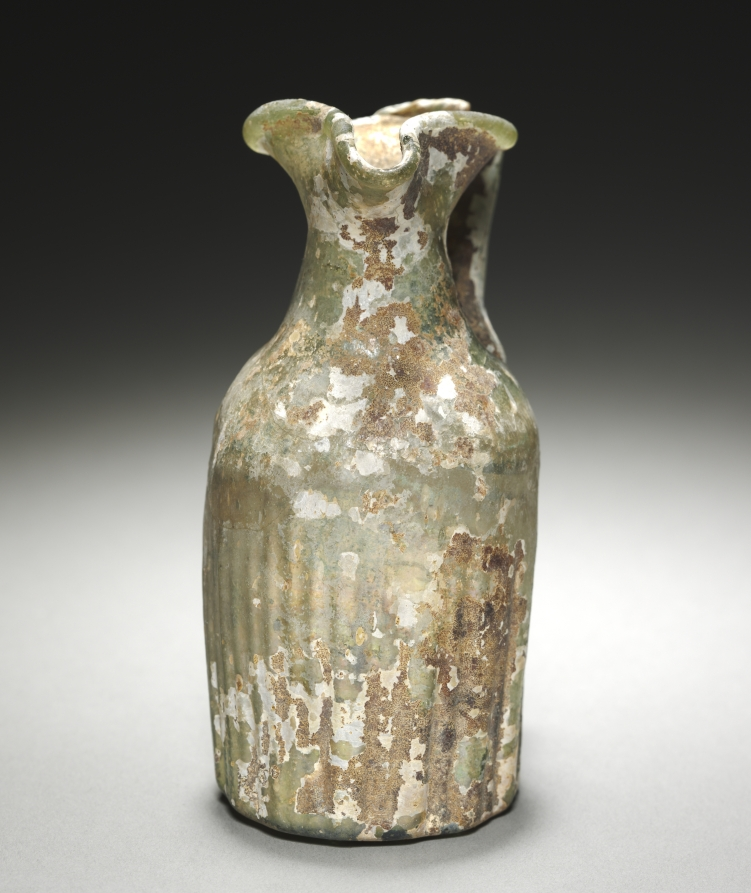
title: Jug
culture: Syro-Palestinian, Roman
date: 300s CE or later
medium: glass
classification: Glass